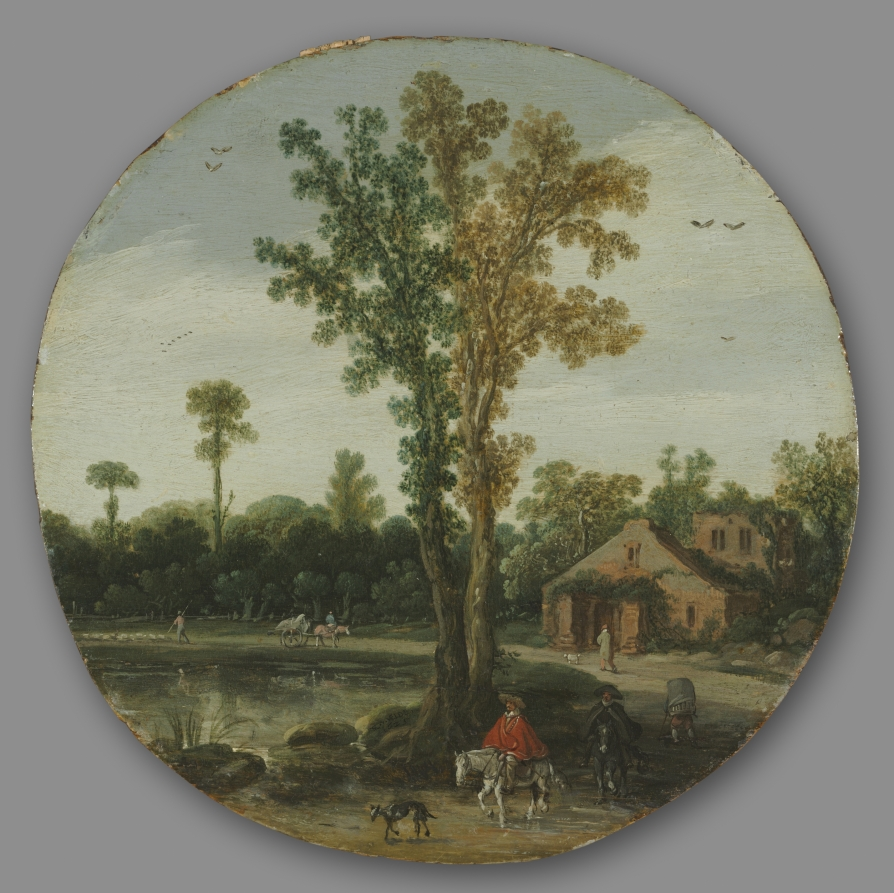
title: Travelers by a Lake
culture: Netherlands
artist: Esaias van de Velde (Dutch, 1587–1630)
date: 1625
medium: oil on wood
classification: Painting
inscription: signed lower center: E.V. Velde. / 1625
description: Prior to the early 1600s, Dutch artists typically painted landscapes as idealized or artificial backdrops to decorate the more important religious or mythological narratives they included. A revolution in landscape painting occurred in Haarlem in the 1610s when artists like Esaias van de Velde started to paint the humble and everyday subjects of the land and people of the Netherlands in convincingly naturalistic detail. The river view was a subject that van de Velde developed in the 1620s. While the water is subordinate to the other elements, its stillness reinforces the serenity of the environment, as do the figures and ruins that exist in in harmony with the natural world. Although van de Velde would have made sketches outdoors, the painting itself was not a copy of these sketches. Rather, as was the common practice, van de Velde would carefully construct paintings in his studio, using a combination of sketches and memories as his inspiration. For its owner, this picture would have satisfied an urban patron's nostalgia for the humble countryside, particularly in light of the rapid urbanization of Dutch society after their independence from Spain in 1609.